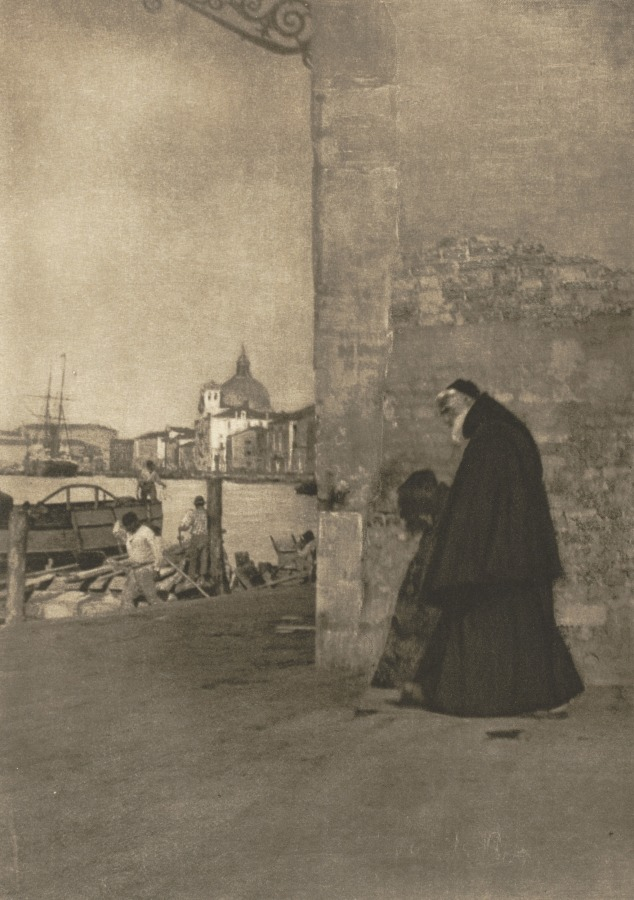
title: Camera Work: A Franciscan, Venice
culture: England, 20th century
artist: J. Craig Annan (British, 1864–1946)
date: 1904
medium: photogravure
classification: Bound Volume